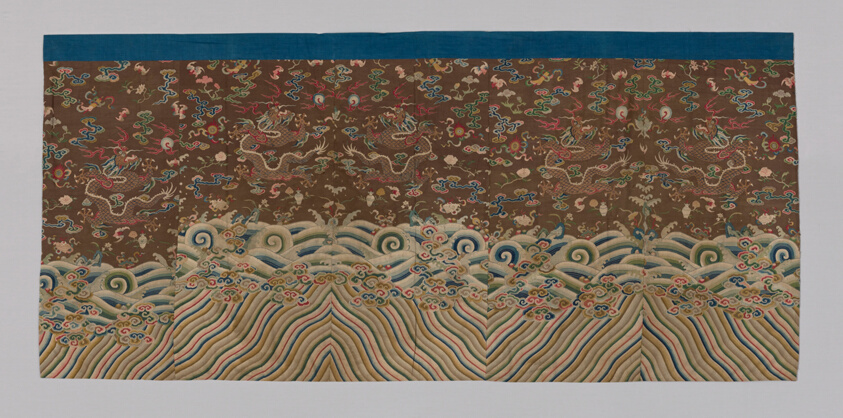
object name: Textile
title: Panel (Dress Fabric)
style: qing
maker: Manchu (China)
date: Qing dynasty (1644–1911), 1750/1800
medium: Silk and gold-leaf-over-lacquered-paper-strip-wrapped silk, slit tapestry weave (kossu) with eccentric wefts; painted; edged and backed with cotton, plain weave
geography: China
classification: textile; weaving - printed